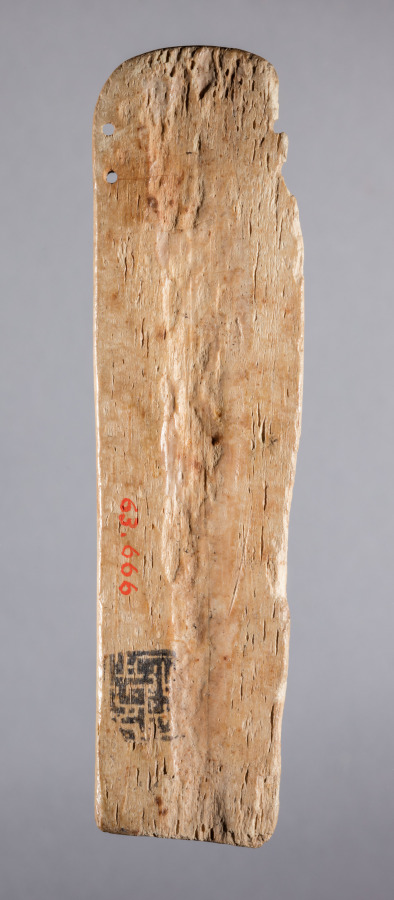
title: Figurine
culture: Iran, early Islamic period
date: 700s - 900s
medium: bone, incised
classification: Miscellaneous